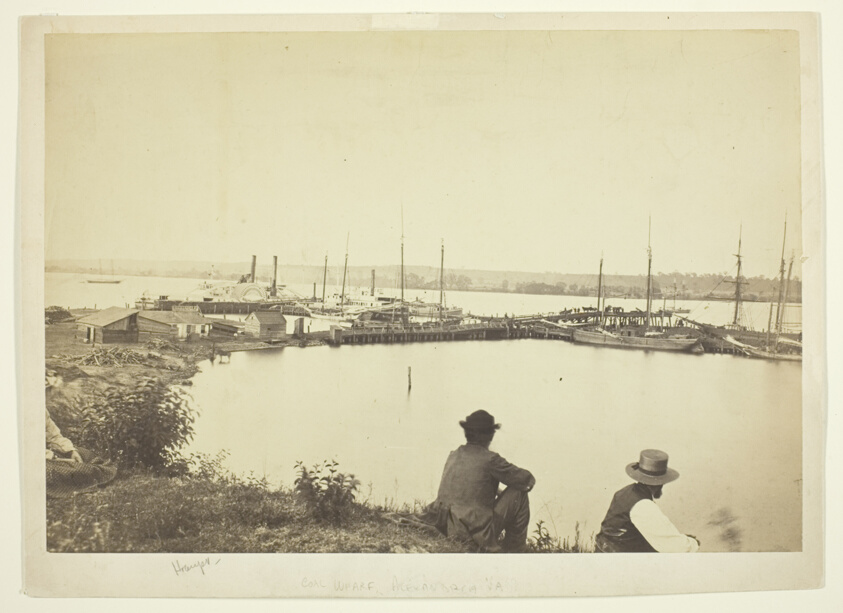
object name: Photograph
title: Coal Wharf, Alexandria, Virginia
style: 19th century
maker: Andrew J. Russell; American, 1830–1902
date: 1863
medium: Albumen print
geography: United States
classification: albumen silver print; photographic process; photography; photograph